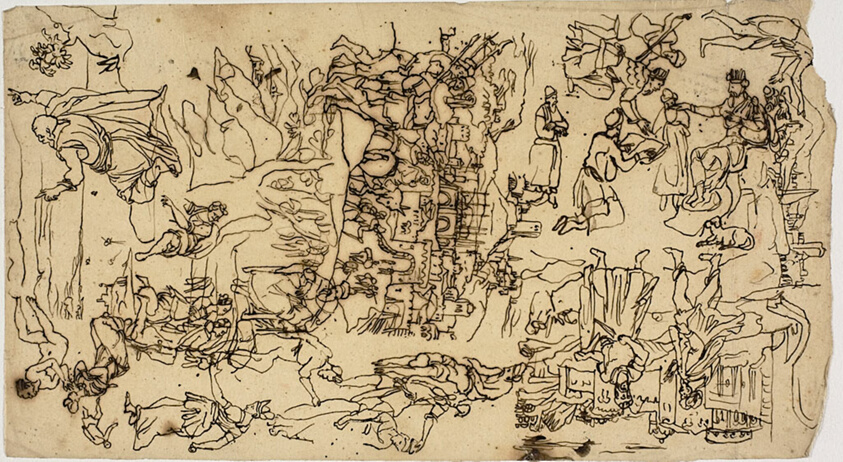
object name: Drawing and Watercolor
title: Biblical Scenes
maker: Rodolphe Bresdin (French, 1825-1885)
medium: Pen and brown ink, on cream tracing paper, laid down on ivory wove paper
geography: France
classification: pen and ink drawings; drawings (visual works); prints and drawing